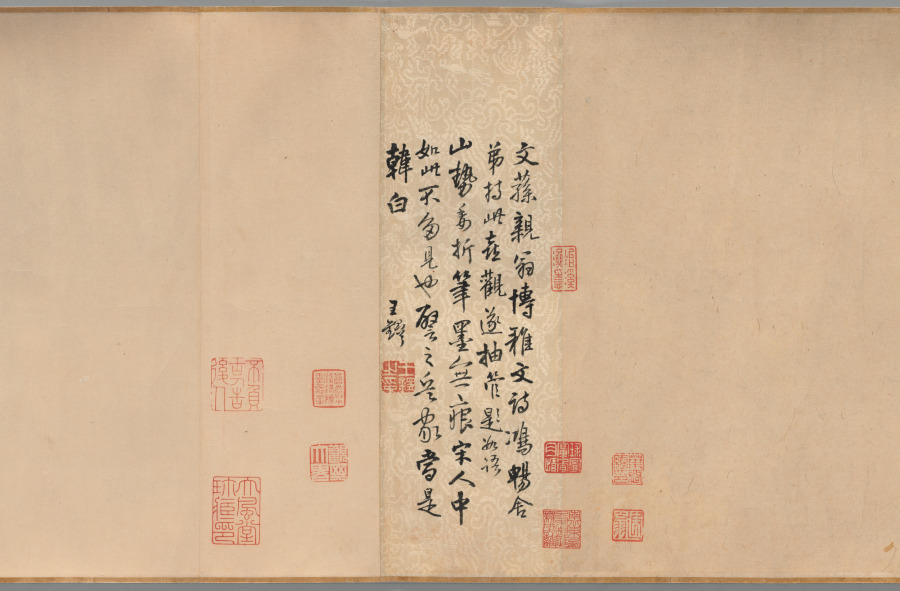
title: Streams and Mountains without End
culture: China, late Northern Song dynasty (960-1127) - Jin dynasty (1115-1234)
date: 1100–1150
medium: handscroll; ink and slight color on silk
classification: Painting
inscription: 9 colophons and 48 seals: 1 colophon, dated 1205, of Wang Wenwei 王文蔚 (dates unknown); 1 colophon, dated 1205, of Li Hui 李惠 (dates unknown); 1 colophon of Weiluo Tian Xie 蔚羅田獬 (dates unknown); 1 colophon, dated 1214, of He Yan 何言 (dates unknown); 1 colophon, dated 1326, of Cao Yuanyong 曹元用 (d. 1329) 1 colophon, dated 1332, of Kangli Zishan 康里子山 (Naonao; 1295-1345); 1 colophon, dated 1336, of Liu Zai 劉載. (dates unknown); 1 colophon, dated 1380, and 4 seals of Yang Mao 楊懋 (1300-after 1380); 4 seals of the Hou family (ca. 1340); 1 colophon of Wang Duo 王鐸 (1592-1652); 4 seals of Zhang Bingqian 張秉乾 (juren of 1729); 8 seals of Liang Qingbiao 梁清標 (1620-1691); 2 seals of the Qianlong emperor (r. 1736-95); 4 seals of the Jiaqing emperor (r. 1796-1820); 3 seals of the Xuantong emperor (r. 1909-11); 2 seals of Ye Gongchuo 葉恭綽 (1881-1968); 17 seals of Zhang Yuan 張爰 (Zhang Daqian 張大千, 1899-1983).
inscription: Colophon 1. Wang Wenwei 王文蔚. Dated third month and third day, 1205, under the reign of Zhangzong of the Jin dynasty. 造物元無心，山川秀氣聚。畫手亦無盡，各出新意度。 誰將妙林泉，淡墨寫縑素。重巒疊嶂間，三兩人家住。 茅舍隔素籬，小橋通細路。溪上數葉舟，雅有物外趣。 嵓崦藏招提，依稀認窗戶。山色四時宜，雲煙自朝暮。 不知塵世中，此景在何處。收拾買山錢，投老好歸去。 泰和乙丑三月三日平原王文蔚謹再拜，書于河東縣署之野趣堂。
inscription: Colophon 2. Li Hui 李惠. The colophon was written three days before the Qingming Festival in 1205. 畫師慣在山中居，含毫吮墨聊自娛。 閑將一段冰霜絹，寫出千里江山圖。 前山後山互出沒，山腰林樾相縈紆。 危橋澗溜瀉鳴玉，山根一匯為平湖。 波平短艇快漁釣，雲深細徑來樵蘇。 僊宮梵宇占幽勝，雕欄複閣森蓬壺。 往來行客煙靄外，飄飄野店青帘孤。 人家雞犬聲相接，熙熙化日安唐宇。 嗟余嗜好何其迂，膏肓泉石真吾徒。 一行作吏墮世網，薄書汨沒勞奔趨。 千巖萬壑但夢想，故園三徑應將蕪。 披圖暫洗黃塵眼，拊膺三嘆空踟躕。 泰和乙丑清明前三日絳臺李惠書于舜城府署之九思堂。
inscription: Colophon 3. Weiluo Tian Xie 蔚羅田獬. 畫工紛紛不可紀，擺脫俗流幾人耳。 夫誰援筆掃鵝溪，一段風煙且千里。 白波青嶂渺無窮，水接山兮山插水。 小橋野店相勾連，古寺樓臺突兀起。 飄然氣象與神俱，但患未明孰姓氏。 郭熙雖老典型存，為問主公無乃是。 此畫世希當寶藏，無與碌碌同一視。 更看卷首數公詩，奇絕清新相表裏。 蔚羅田獬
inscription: Colophon 4. He Yan 何言. Written in 1214. 萬有來自無，一真歸所託。畫師得三昧，胸中幻丘壑。 百態逐墨破，群形隨筆落。地近迹分明，天遙痕隱約。 雲物自吐吞，峯巒非斧鑿。江鄉閴無市，谷關常不鑰。 中有野夫閑，童琴而歩鶴。酒斾出籬懸，漁舟臨岸泊。 澗樹蔽橋樑，巖松迷殿閣。岑疊宿霧重，野曠林煙薄。 危棧接縈紆，亂泉通脈絡。途中人往來，僕馬何羸弱。 怪石虎踡跼，古木龍蟠錯。一幅宜好收，千金非易博。 玉堂閑卷舒，眼界增寥廓。視險尚寛平，見危除慘虐。 氣象溢國華，川澤資廟略。功名業已書，歸去鞭先著。 但知色即空，何是今非昨。飽乎仁智心，箇中無限樂。 貞祐甲戌秋暮，東營何言題。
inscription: Colophon 5. Cao Yuanyong 曹元用 (d. 1329). Dated 1326. 岸擁危橋斷，溪浮小艇斜。 萬山最深處，依約兩三家。 泰定丙寅秋，曹元用題。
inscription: Colophon 6. Kangli Zishan 康里子山 (i.e., Kangli Naonao). The colophon bears a date of 1332. 右溪山圖，意韻蕭灑。一見使人有烟霞之想，真可珍藏。又有□金諸名勝題詩其左。兵火之餘， 殊不易得也。 至順三年暮春之月，康里子山跋。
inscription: Colophon 7. Liu Zai 劉載. 雲拂埜田閑種玉，雨餘巖溜碎傾金。 幾時也結團茆去，麟閤恬然不挂心。 至元二年正月，長安劉載載之謹錄上。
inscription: Colophon 8. Yang Mao 楊懋 (1300–after 1380). 觀此圖，經營位置，筆法高古，山明石潤。其橋梁、路道、樹林、人物、遠近；一一誠得真山水之深趣。非當時名筆有大才者不能至此。不必問其誰何，可為神品。况宋金元三朝名公所跋，尚不能記，想其來尤遠矣。然而物經累變而尚存，是物之有壽者也。余不復再論。文顯其保之。洪武庚申春，八十翁楊懋觀。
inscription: Colophon 9. Wang Duo 王鐸 (1592–1652). 文蓀親翁博雅，文詩鴻暢。舍弟持此喜觀，遂抽管題數語： 山勢委折，筆墨無痕。宋人中如此不多見也。譬之兵家，當是韓白。王鐸。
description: Streams and Mountains without End was a landmark acquisition of 1953, made just a year after Sherman Lee had returned to Cleveland as curator of Oriental art. He acquired it with the intention to provide "a more than adequate foundation for a fine collection of Chinese landscape painting." This impressive work demonstrates the culmination of stylistic developments in Chinese monumental landscape painting following the Northern Song tradition. It represents a journey through a landscape, making it a fitting metaphor for Lee’s journey of discovery and achievement over a lifetime.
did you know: The portrayal of the distant lands is rich with details like pavilions, villages, and human activities.